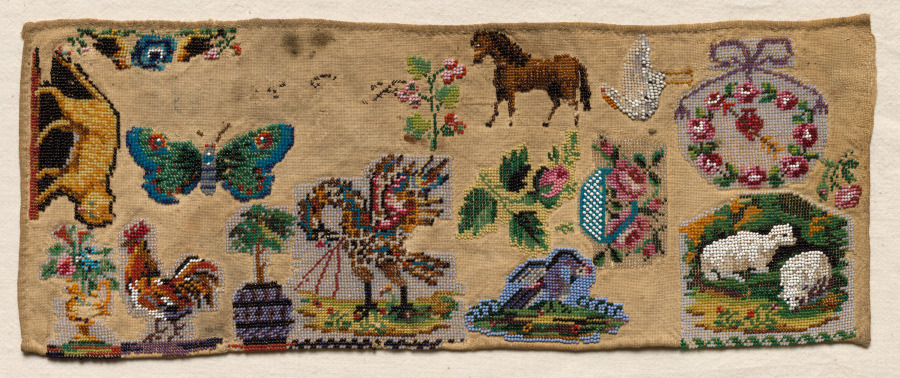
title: Sampler Fragment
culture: Mexico, 19th century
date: 1800s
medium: embroidery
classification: Sampler